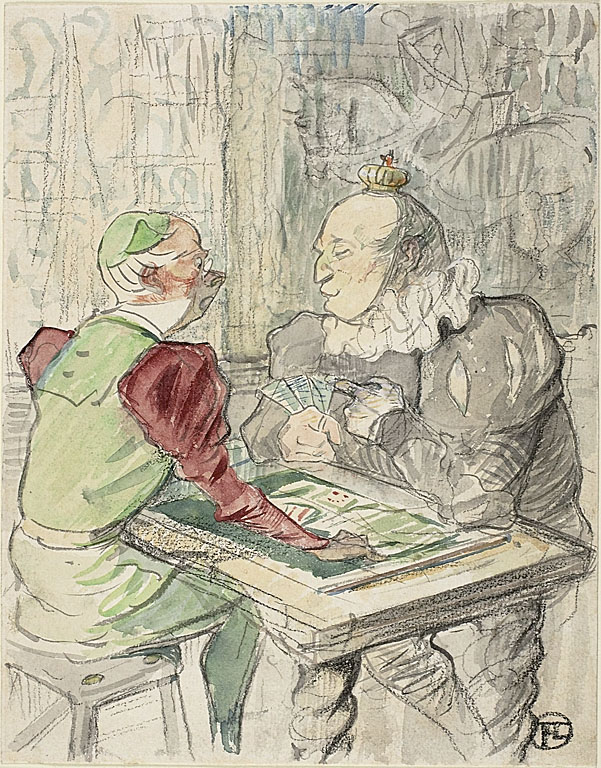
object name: Drawing and Watercolor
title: The King's Card Game, copy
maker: Henri de Toulouse-Lautrec; French, 1864-1901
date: after 1895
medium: Watercolor, with black crayon, heightened with touches of lead white (discolored) on ivory watercolor paper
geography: France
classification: watercolor; drawings (visual works); prints and drawing